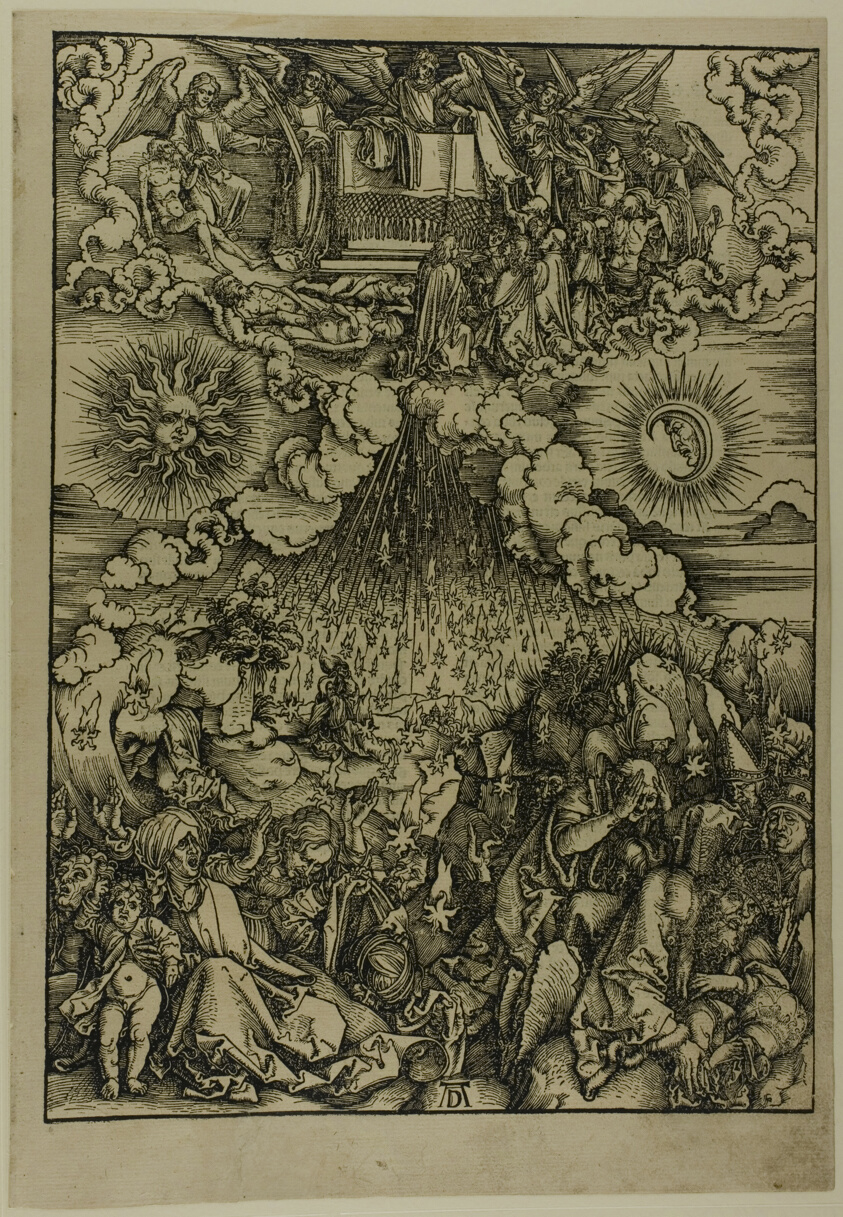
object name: Print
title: The Opening of the Fifth and Sixth Seals, from The Apocalypse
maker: Albrecht Dürer (German, 1471-1528)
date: c. 1496–98, published 1511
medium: Woodcut in black on tan laid paper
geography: Germany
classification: woodcut; print; prints and drawing; paper